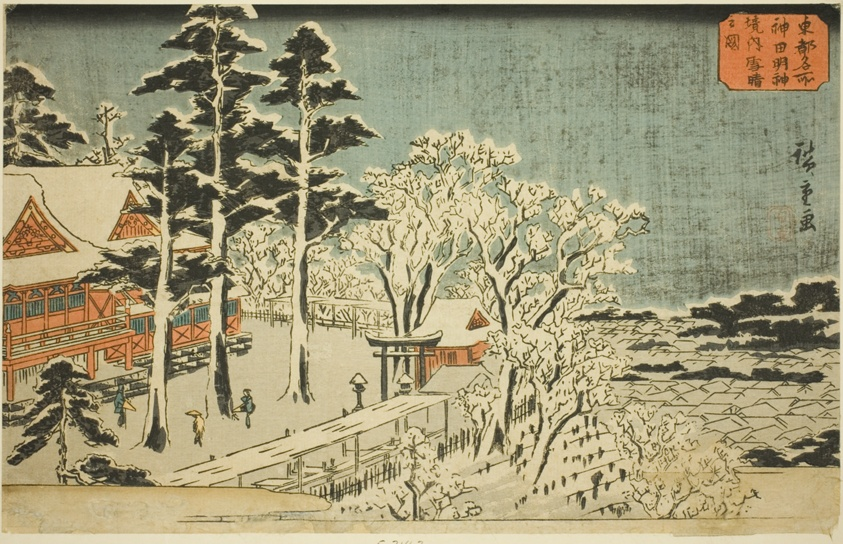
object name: Print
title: Clear Weather after Snowfall at the Precincts of the Kanda Myojin Shrine (Kanda Myojin keidai yukibare no zu), from the series "Famous Places in the Eastern Capital (Toto meisho)"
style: Japanese (culture or style)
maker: Utagawa Hiroshige 歌川 広重; Japanese, 1797-1858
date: c. 1840/42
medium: Color woodblock print; oban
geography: Japan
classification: woodblock print; print; asian art